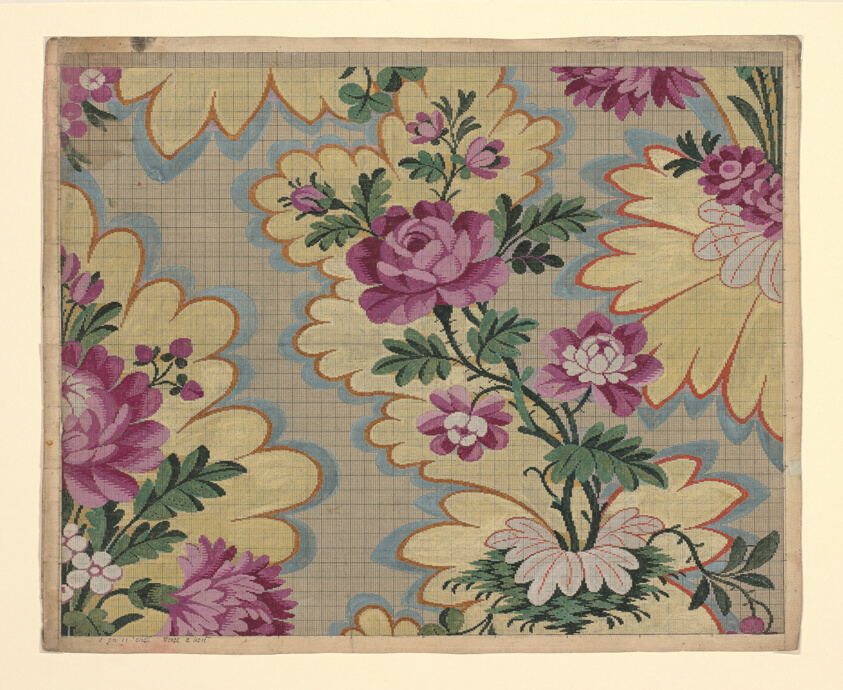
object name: Drawing and Watercolor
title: Mise-en-Carte (Point-Paper)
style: 18th Century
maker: Designed for Germain Frères (French, active 1760s–70s); Lyon, France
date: 1760s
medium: Opaque watercolor over etching in black ink on cream laid paper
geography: Lyon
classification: design; accessory - paper design; watercolor; garment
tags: floral motifs, foliage, flowers, grids